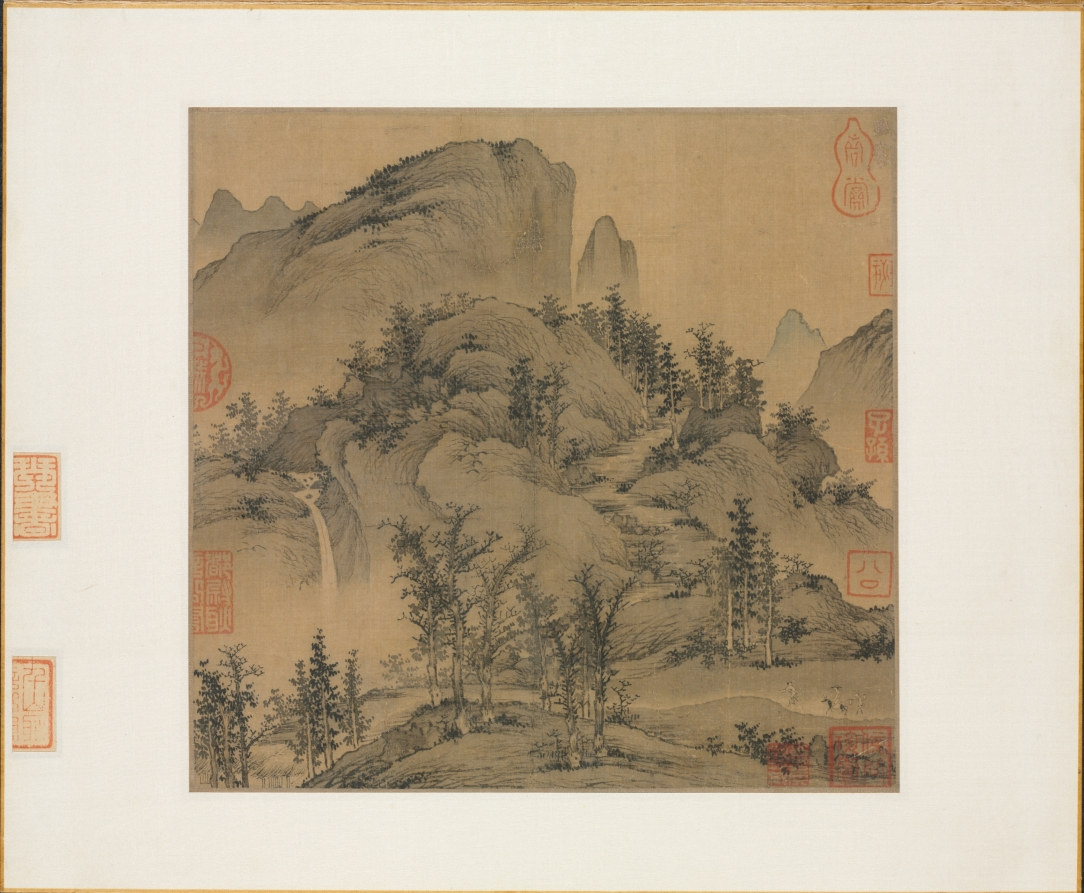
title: Travelers in Autumn Mountains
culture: China, Yuan dynasty (1271-1368)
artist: Sheng Mou (Chinese, active c. 1310–1350)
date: 1300–50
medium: album leaf; ink and slight color on silk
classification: Painting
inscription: 盛 ?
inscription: 10 collectors' seals: 8 of Geng Zhaozhong 耿昭忠 (1640-1686); 2 of Geng Jiazuo 耿嘉祚 (late 1600s-early 1700s), son of Geng Zhaozhong.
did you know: Most of the signature of the artist has been scraped away, so that only the character "Sheng" is legible.